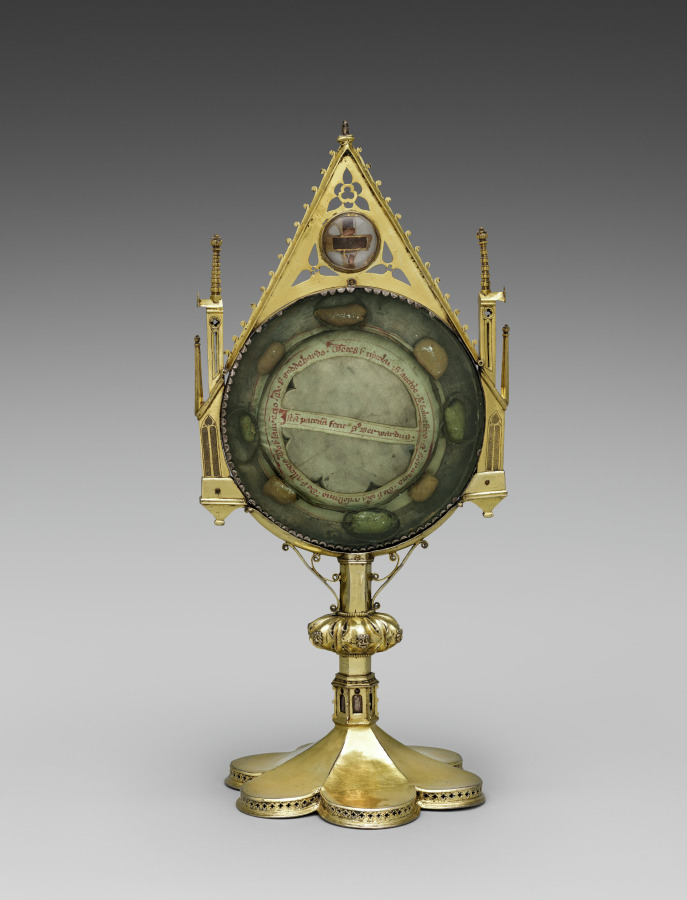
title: Monstrance with the "Paten of Saint Bernward"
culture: paten: Germany, Lower Saxony, Hildesheim; monstrance: Germany, Lower Saxony, Brunswick, Gothic period, paten: 12th century; monstrance: 14th century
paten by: Saint Oswald Reliquary Workshop (German)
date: c. 1180–1190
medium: silver, gilded silver, niello, rock crystal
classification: Metalwork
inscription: located in monstrance: two slivers of the True Cross surrounded by parchment with the inscription: DE SIGILLO DOMINI. Paten inscribed: +EST.CORPVS.IN.SE.PANIS.QVI.FRANGITVR.IN.ME:VIVET.IN ETERNVM. QVI.BENE.SVMIT.EVM. (outer rim); +HVC.SPECTATE. VIRI.SIC.VOS MORIENDO.REDEMI.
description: Designed to facilitate the display and veneration of ten relics, this sumptuous ostensorium (from the Latin ostendere, meaning "to show") is one of the most unusual reliquaries in the Guelph Treasure. Elements of contemporary Gothic architecture in miniature frame an elaborately decorated liturgical paten, the shallow disc or plate used for the elevation of the Eucharist during Mass. Fragments of the True Cross are enclosed behind a rock crystal in the gable, while other saintly relics, each wrapped in silk and identified by inscriptions, are visible only from the back. The paten is inscribed on its outer rim with the words "The bread which is broken in me is the body itself. He who receives it in good faith shall live in eternity." Another inscription surrounding the image of the enthroned Christ at the paten's center, reads, "Behold, o men, I have thus redeemed you with my death." Symbols of the four Evangelists and personifications of the four cardinal virtues complete the paten's iconographic program.